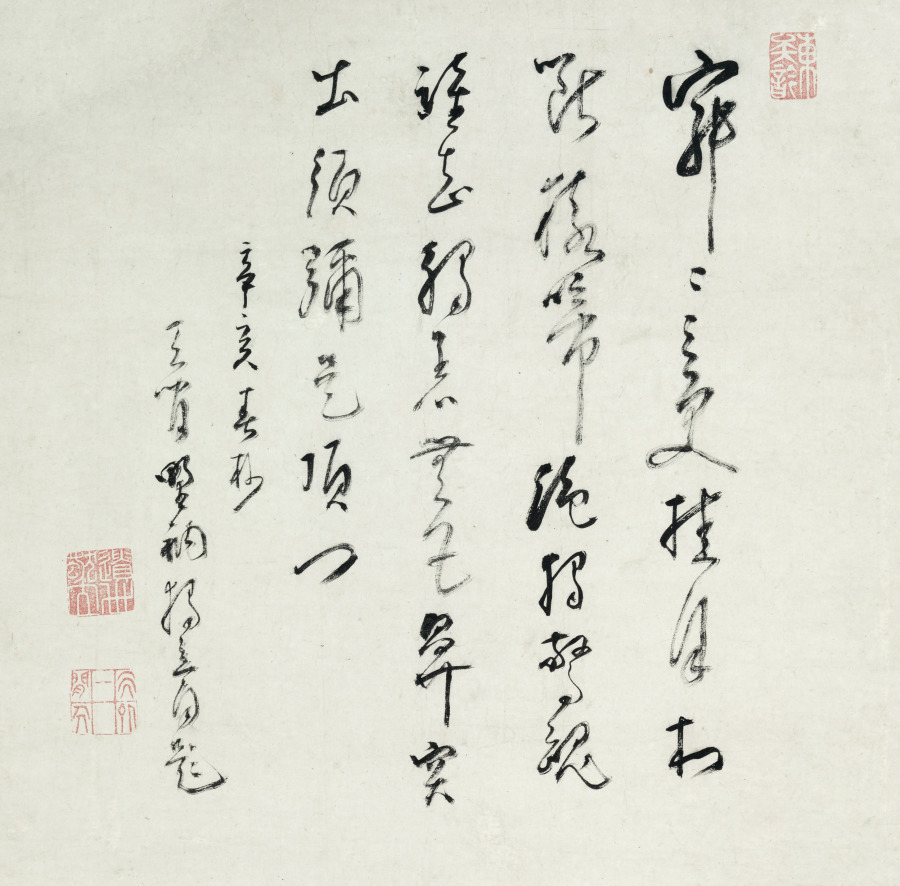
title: Portrait of Duli Xingyi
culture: Japan, Edo period (1615–1868)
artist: Kita Genki (Japanese, active c. 1664–98)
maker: Duli Xingyi (Chinese, 1596–1672)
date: 1671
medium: hanging scroll; ink and color on paper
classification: Painting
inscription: 1671 inscription at top of scroll by Duli Xingyi with three seals, 東矣䪩 (prefatory), 遺世獨立 (top) , 天外一閒人 (bottom); seal of Genki at lower left of painting 元規 .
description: In this portrait, the Ōbaku school Buddhist monk Duli Xingyi (born Tai Li, 1596–1672), whose name is pronounced Dokuryū Shōeki in Japanese, sits upon a woven mat holding a ceremonial scepter known as a ruyi, or nyoi in Japanese. Above his head is an insciption he added to the painting in 1671, the year before his death. It may be translated to read: Contemplative emptiness: the moon suspended over the village at midnight. Suddenly my soul is startled by the howl of an ape. Who could know that it would arouse me beyond my senses, and bring me an inner vision from Mt. Sumeru. (translated by Stephen Addiss and Kwan S. Wong) Originally from what is now the city of Hangzhou in China, Duli emigrated to Japan in 1653, where he took monastic vows. His skills in calligraphy and seal carving were formidable. Painter Kita Genki combined Chinese brush styles he learned in Nagasaki with Western painting techniques to capture Duli's likeness.